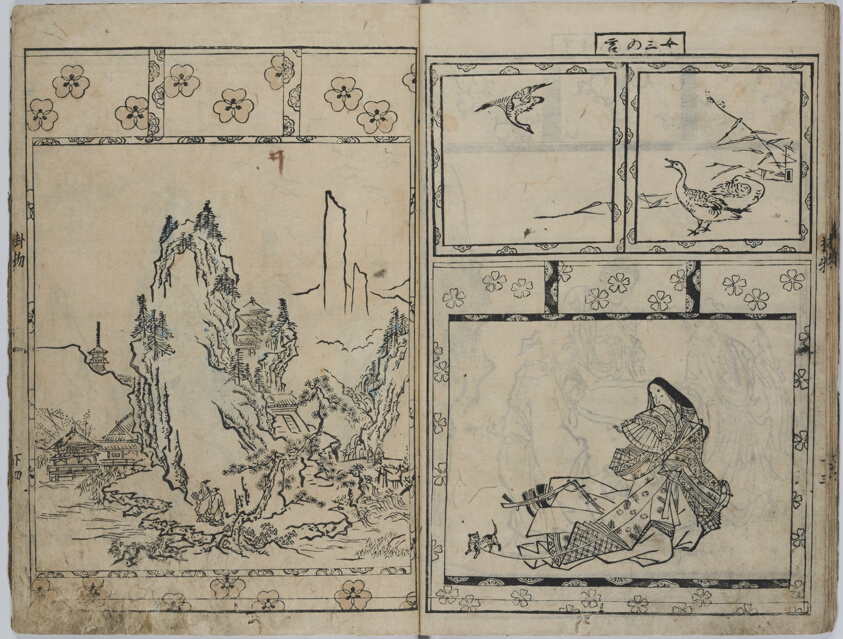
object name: Book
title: The Evergreen Pine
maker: Hishikawa Moronobu 菱川師宣; Japanese, 1618-1694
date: 1682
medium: Woodblock-printed book, sumizuri-e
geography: Japan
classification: book